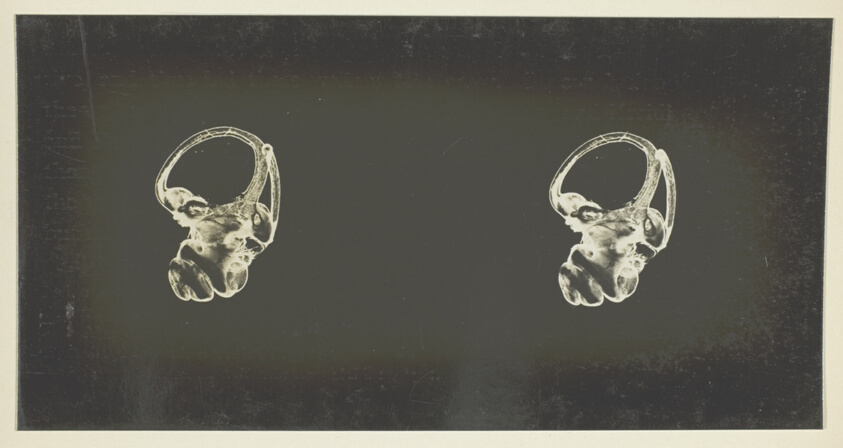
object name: Photograph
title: The Labyrinth of Animals; Including Mammals, Birds, Reptiles, & Amphibians - Vol. I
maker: Albert A. Gray (English, 1868–1936), author; published by J. A. Churchill (English, 20th century)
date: 1907; 1900/08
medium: Vol. I, Illustrated with 31 stereographs (actual photographs)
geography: England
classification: unidentified; photography; photograph